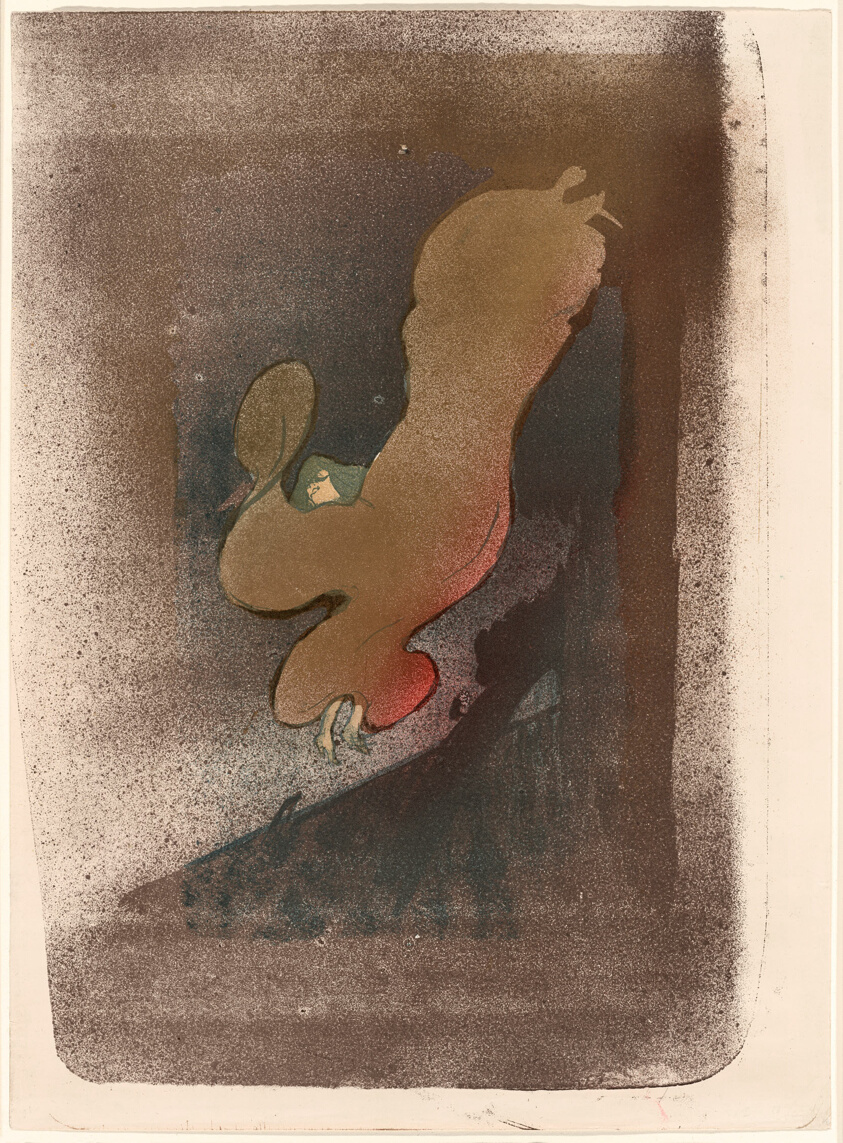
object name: Print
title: Miss Loïe Fuller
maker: Henri de Toulouse-Lautrec (French, 1864-1901)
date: 1893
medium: Color lithograph on cream wove paper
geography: France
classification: lithograph; print; prints and drawing